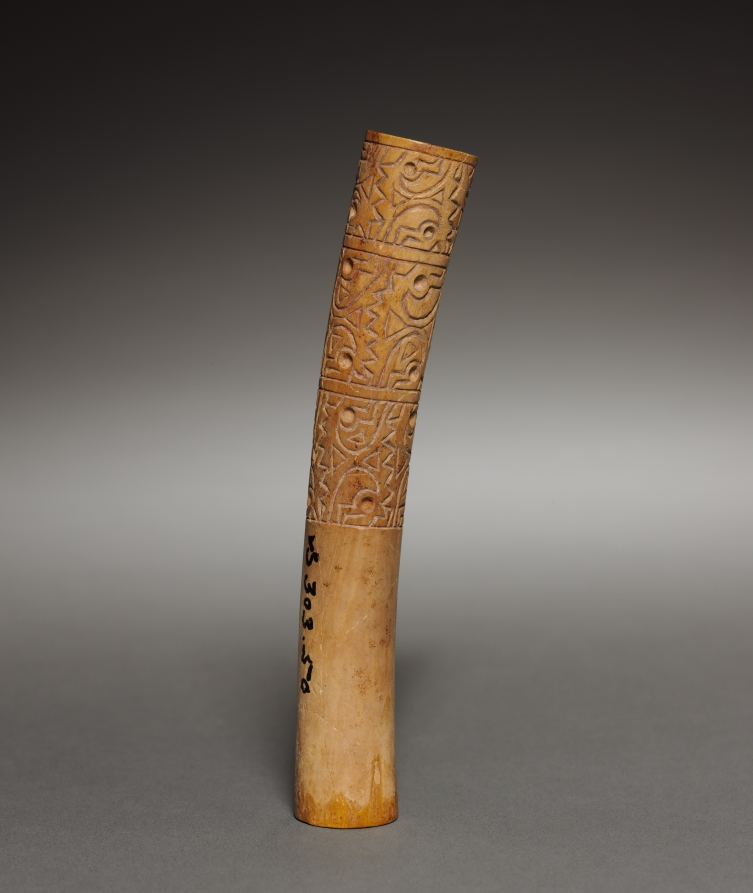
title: Ear Ornament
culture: Peru, Moche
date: 200–550 CE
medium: incised bone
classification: Jewelry